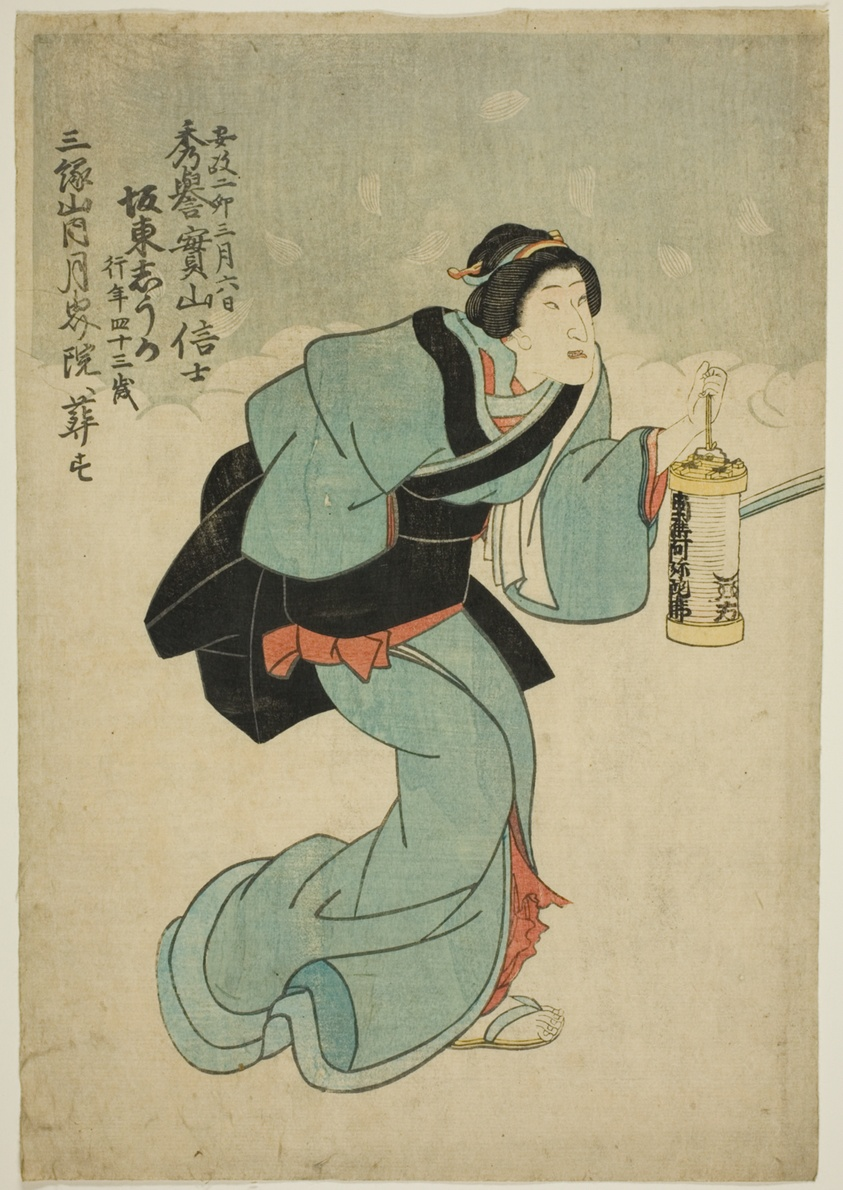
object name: Print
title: Memorial Portrait of the Actor Bando Shuka I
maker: Utagawa School (Japanese, 19th century)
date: 1855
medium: Color woodblock print; left sheet of oban diptych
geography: Japan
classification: print; asian art